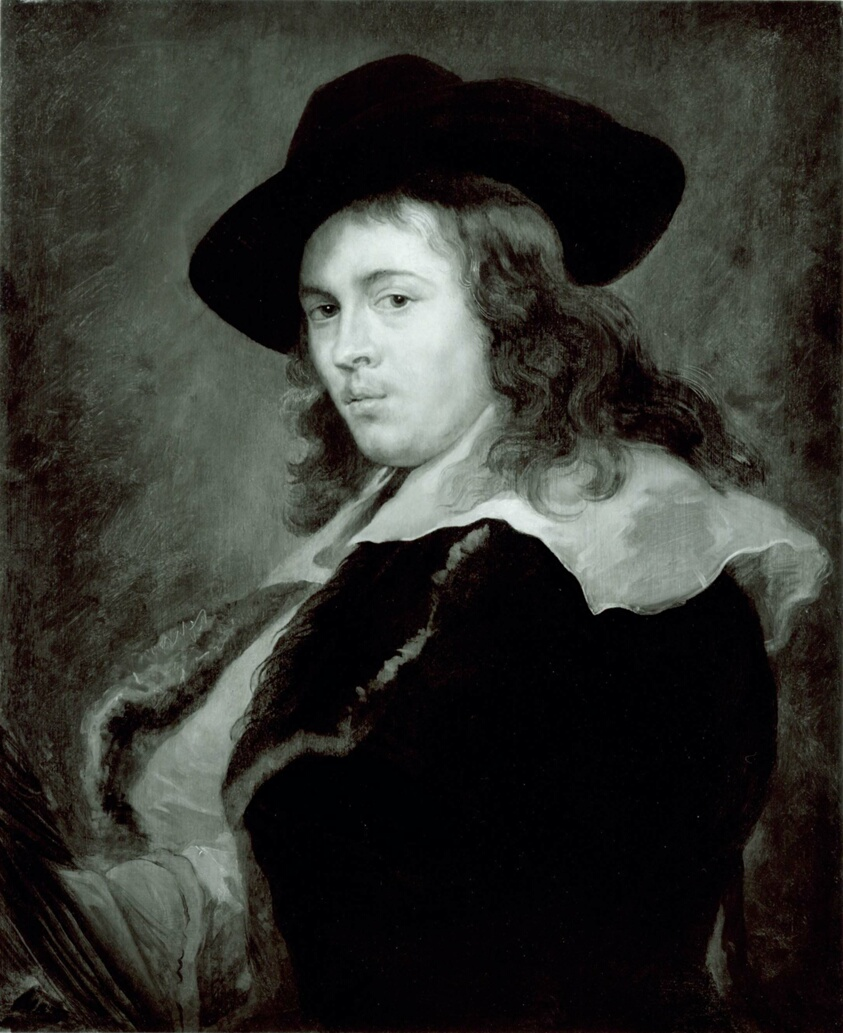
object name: Painting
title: Nicolas Rubens, the artist's son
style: 17th Century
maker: Attributed to Peter Paul Rubens (Flemish, 1577–1640)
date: Late 1630s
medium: Oil on panel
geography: Flanders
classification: painting; portrait; paint; oil paintings (visual works); oil on panel; flemish; european painting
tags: portraits, portrait, portraits: male subject, man, hat